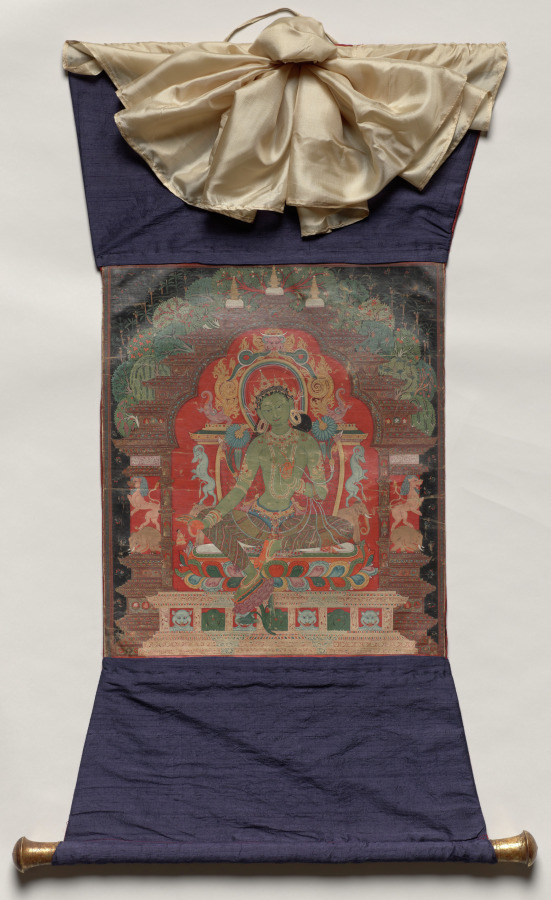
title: Green Tara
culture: Central Tibet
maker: attributed to Aniko (Nepalese, active in Tibet mid- to late 1200s)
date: c. 1260s; mounted, 2020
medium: thangka; gum tempera, ink, and gold on sized cotton; mount: silk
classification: Painting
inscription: Om Ah Hum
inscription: om tare tutare ture svaha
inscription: Om Ah Hum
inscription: Om Ah Hum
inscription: om ah sarva vyida svaha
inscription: ye dharmā hetuprabhavā he- tuṃ teṣāṃ tathāgato hy avadat teṣāṃ ca yo nirodha evaṃvādī mahāśramaṇaḥ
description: For Tibetans, Green Tara is one of the preeminent figures of their Buddhist faith, a radiant savioress who embodies the female form of the perfect, enlightened mind. The Green Tara in the Cleveland thangka—a Tibetan devotional painting on cloth—specifically dispels fear and provides protection, just like her mantra inscribed on the back side of the painting. Her green color and fear-not gesture link her to the cosmic Buddha of the North, enshrined above her head. Most scholars agree that this work was painted by the celebrated Nepalese artist known as Aniko.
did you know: The tiny monastic figure under Green Tara's right hand commissioned the painting.